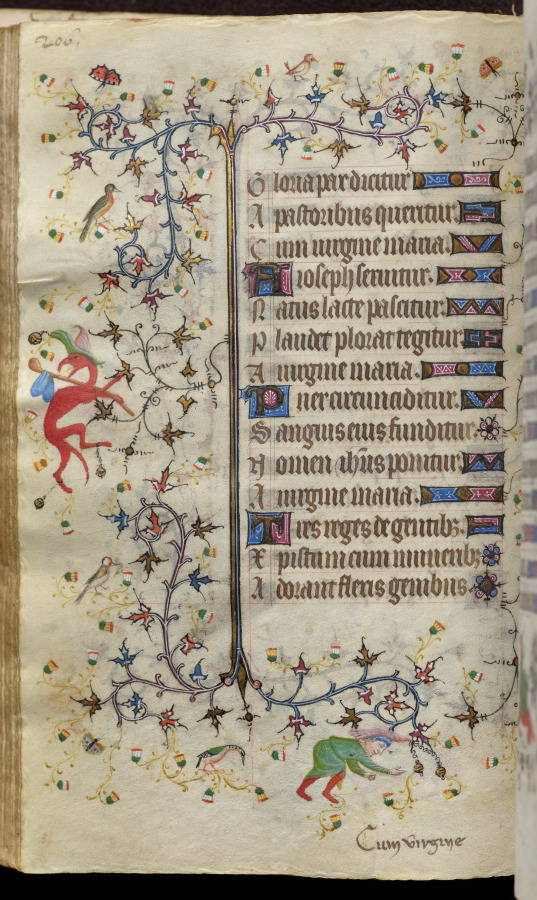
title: Hours of Charles the Noble, King of Navarre (1361-1425): fol. 103v, Text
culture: France, Paris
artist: Master of the Brussels Initials and Associates (French)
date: c. 1405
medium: ink, tempera, and gold on vellum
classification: Bound Volume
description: This precious volume was obviously highly prized by its owner, the French-born King of Navarre, who had his coat of arms painted on no less than twenty folios. Rather than directly commissioning this manuscript from a specific workshop, it seems that Charles the Noble acquired his book of hours -- perhaps ready-made for the luxury market -- while on a trip to Paris in 1404-05. A collaborative effort, six painting styles are evidenced within the pages of this codex, those of two Italians, two Frenchmen, and two Netherlanders. The painter who was responsible for the planning and decoration of the book, and who produced seventeen of the large miniatures, was a Bolognese artist known as the Master of the Brussels Initials. His principal assistant, responsible for most of the borders, was a Florentine who signed his name "Zecho" da Firenze on folio 208 verso.